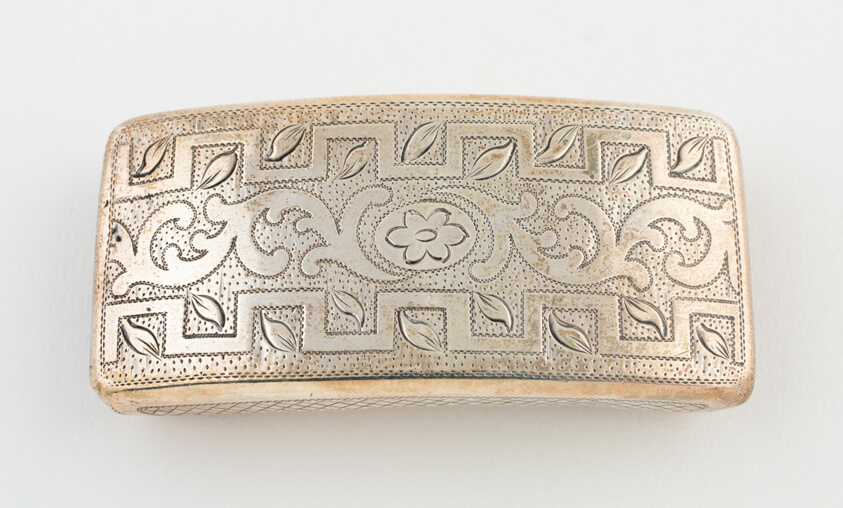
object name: Metalwork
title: Vinaigrette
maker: Marked KH & Co.; Birmingham, England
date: c. 1806/07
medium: Silver and silver gilt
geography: Birmingham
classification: container for personal use; vinaigrette (container for health care); european decorative arts; metalwork; silver; decorative object/ornament